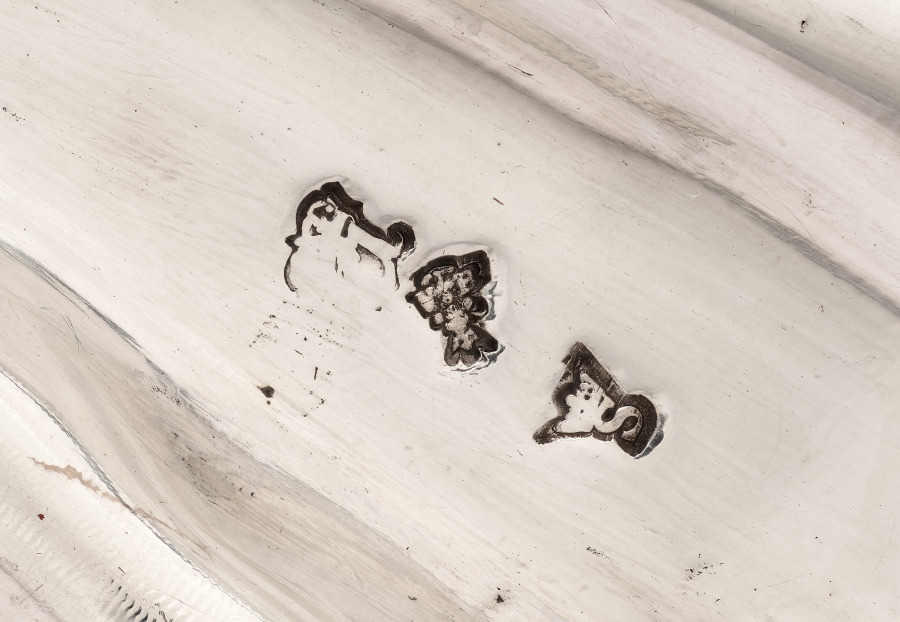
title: Cover for a Tureen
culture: France, Paris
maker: Henry Adnet (French, 1745)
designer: Juste-Aurèle Meissonnier (French, 1695–1750)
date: 1735–38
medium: silver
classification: Silver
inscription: engraved Meissonnier signature.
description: See entry for cover record 1977.182.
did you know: The langoustine, pigeon, and vegetables were cast using real examples giving the silver copies lifelike detail and appearance.